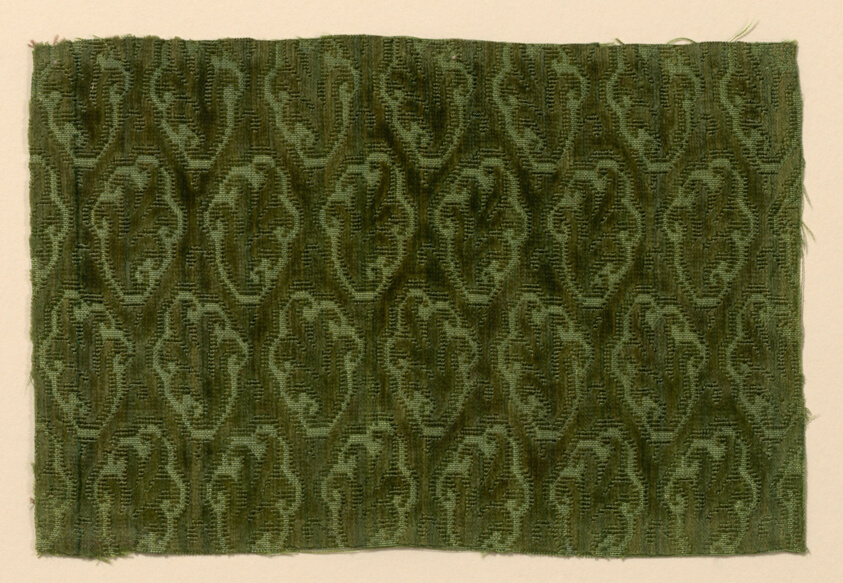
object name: Textile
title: Fragment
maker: Italy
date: Early 17th century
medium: Silk, plain weave with supplementary pile warps forming cut, uncut, and voided velvet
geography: Italy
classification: textile; weaving - velvet; weaving